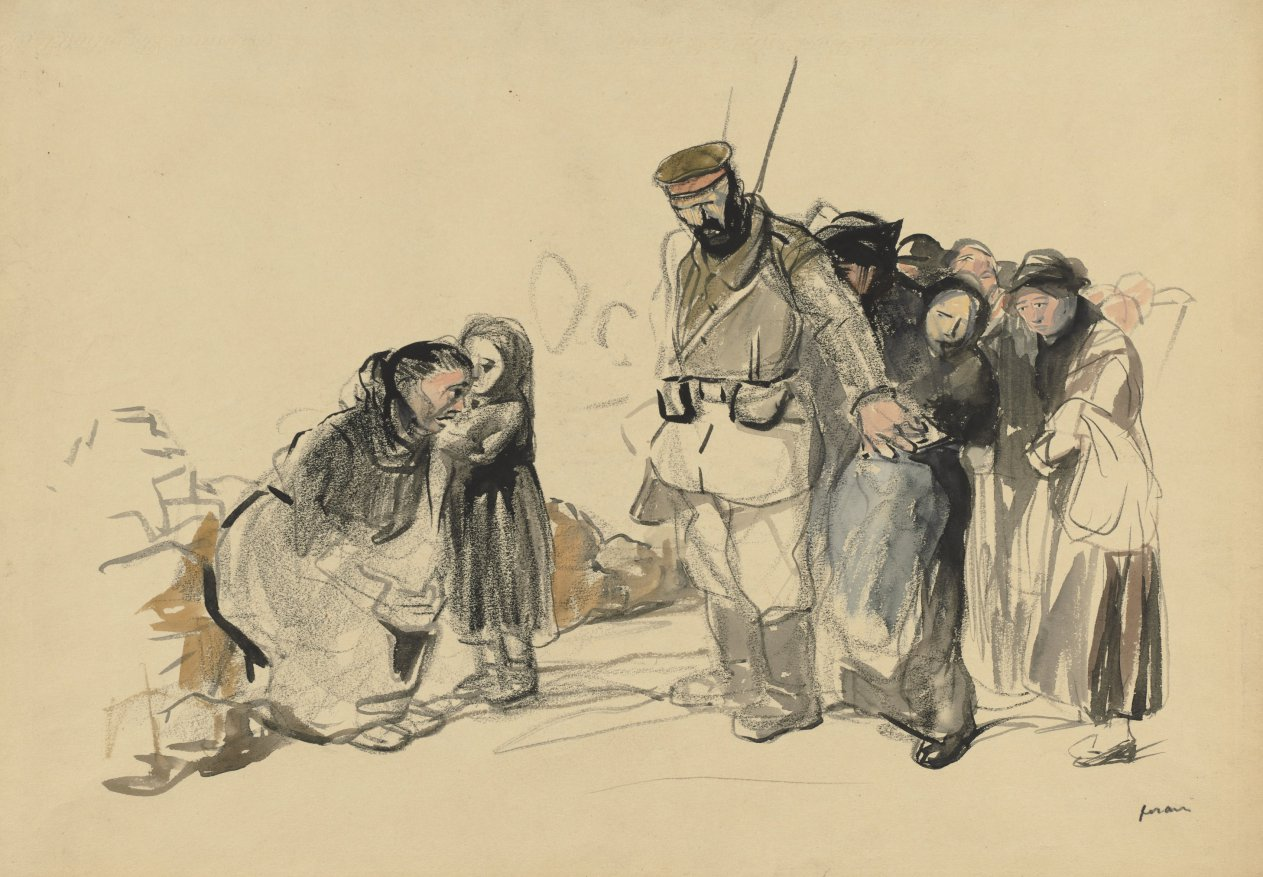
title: The Slavery in the North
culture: France, late 19th-early 20th Century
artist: Jean Louis Forain (French, 1852–1931)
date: fourth quarter 1800s or first third 1900s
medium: black crayon, gouache, and watercolor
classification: Drawing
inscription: signed, lower right, in graphite: forain ; lower right, in graphite: A2173